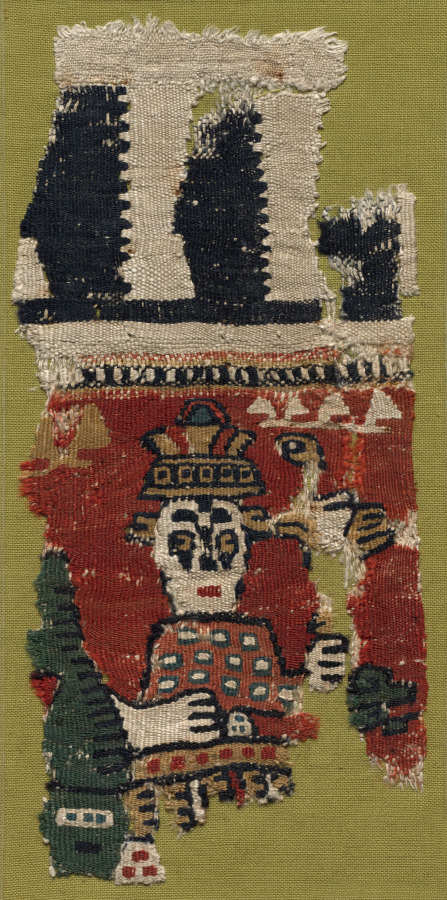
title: Fragment of an Ornament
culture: Egypt, Abbasid period (?), 8th - 9th century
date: 700s - 800s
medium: tabby weave with inwoven tapestry ornament, linen and wool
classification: Textile